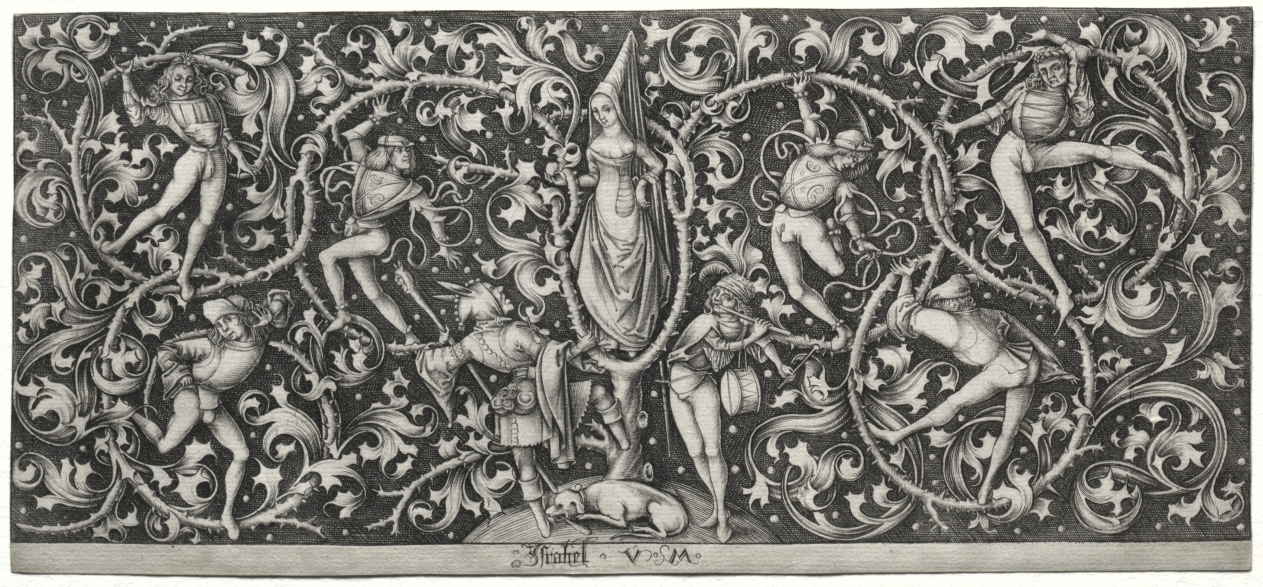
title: Ornament with Dance of the Lovers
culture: Germany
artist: Israhel van Meckenem (German, c. 1440–1503)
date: c. 1490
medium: engraving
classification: Print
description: In this image, the competitive nature of love and sexual desire plays out on treacherously thorned vines that block the young suitors from their ultimate prize, the elegant lady in the center. Given the presence of two musicians, the male suitors may be performing a type of folk dance, known as a Morris dance, which was popular in courtly circles at the time, and which relates, as well, to courtly love poetry performed by troubadours (lyrical poets of the Middle Ages).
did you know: Ornament prints such as this were often used by other artists and craftsmen as source material for motifs on decorative arts or furniture.